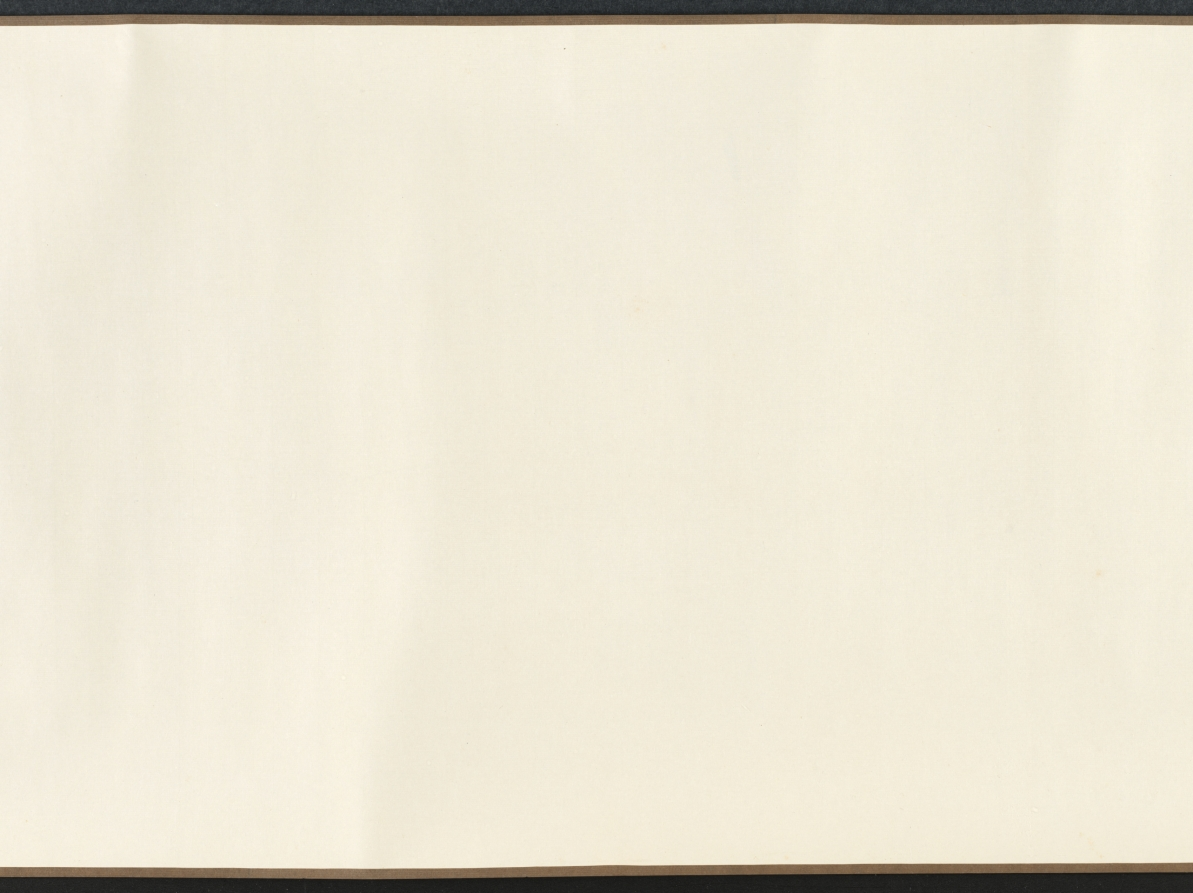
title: Ink Flowers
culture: China, Yuan dynasty (1271-1368)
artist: Zhao Zhong (Chinese, second half of the 1300s)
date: 1361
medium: Handscroll; ink on paper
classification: Painting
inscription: 寶帶同心結，香羅合歡扇。/ 繡作錦鴛鴦，雙雙為君獻。/ 薔薇露灑熏籠衣，馨香奉君君勿違。 原初并題。 [印] 趙衷原初畫記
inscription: 翠袂素羅韈，玉臺黃金盃。浩歌渡弱水。天風卷海三山開，麻姑方平為招飲，蛟宮獻舞銀濤堆。 原初并題。 [印] 雲林清趣、[印] 趙衷原初畫記。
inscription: 右用湯叔雅慶元中所寫墨花法作此卷，又效李長吉體賦詩以題之。詩與畫雖未工，要皆出於古人之餘，譬猶欲成方圓而必求其規矩之用也，識者毋誚焉！至正辛丑八月望日，東吳野人趙衷原初謹識。 [印] 趙原初、[印] 傳世清玩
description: Zhao Zhong's flowers, each paired with a poem, echo the fine-style colored flowers of the academic tradition, but instead he used only ink. Fine lines define the contours of each plant, as well as the veins within each petal and leaf. Careful ink washes give subtle modeling to the forms. The combination of lily, narcissus, and peony is unusual as the three belong to no known seasonal or symbolic system popular in the fourteenth century. Zhao’s medical training may have influenced the selection. Powdered lilies, for example, were prescribed to dispel grief, while the bark of tree peony roots was used as a treatment for various blood disorders.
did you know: This handscroll is a very rare example of ink flowers in the linear baimiao style of the fourteenth century.